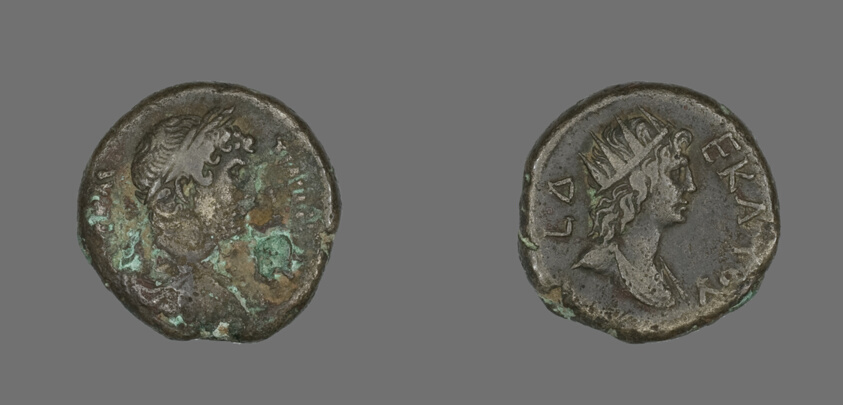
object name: Coin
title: Tetradrachm (Coin) Portraying Emperor Hadrian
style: roman period (egyptian), greco-roman (egyptian)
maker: Roman, minted in Alexandria, Egypt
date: 117-138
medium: Billon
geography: Egypt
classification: coin; ancient art